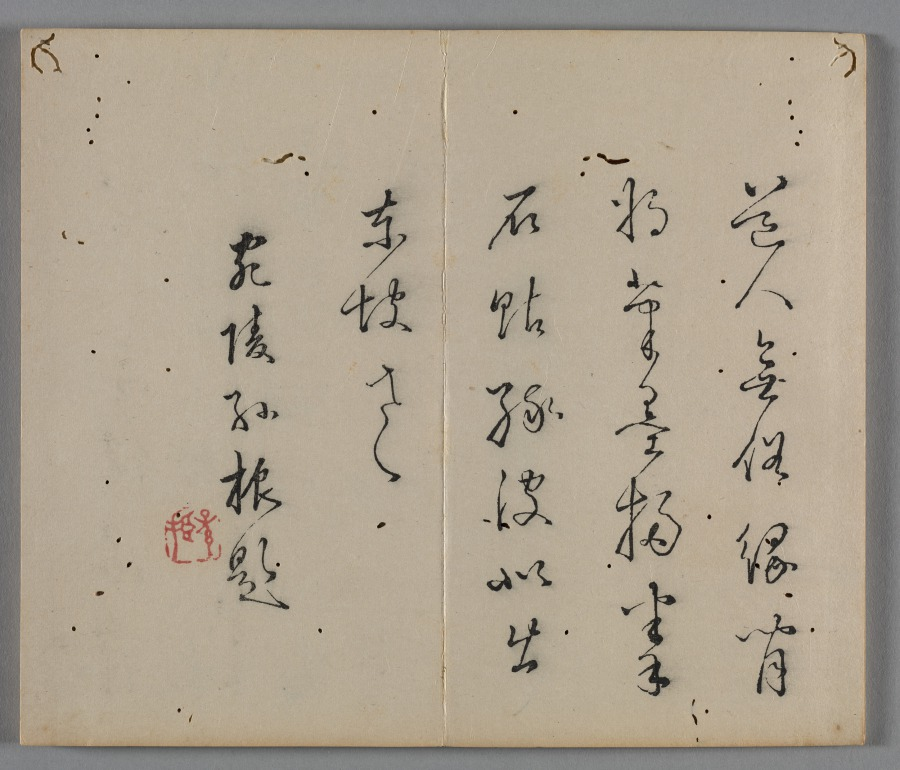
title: Ten Bamboo Studio Painting and Calligraphy Handbook (Shizhuzhai shuhua pu): Birds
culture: China, Qing dynasty (1644-1911)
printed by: Hu Zhengyan (Chinese, c. 1584–1674)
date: 1633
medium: Woodblock-printed book; ink and colors on paper; first edition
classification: Print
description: Color printing reached a level of perfection in the early 1600s, as seen in this Ten Bamboo Studio Collection of Calligraphy and Painting and the Mustard Seed Garden Manual of Painting (printed 1679 and 1701). The painterly quality, precision in registering (aligning) the woodblocks, and harmonious colors made them the most successful color print editions in Chinese history. Both editions were printed and compiled in Nanjing, spread nationwide, and had a great impact on the arts in Japan and Korea.